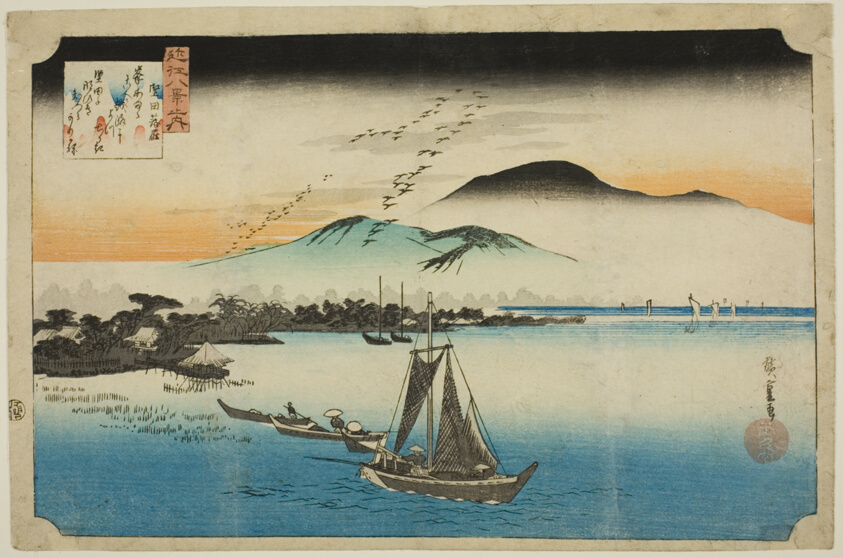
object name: Print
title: Descending Geese at Katada (Katada rakugan), from the series "Eight Views of Omi (Omi hakkei no uchi)"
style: Japanese (culture or style)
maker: Utagawa Hiroshige 歌川 広重; Japanese, 1797-1858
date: c. 1834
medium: Color woodblock print; oban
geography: Japan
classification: woodblock print; print; asian art